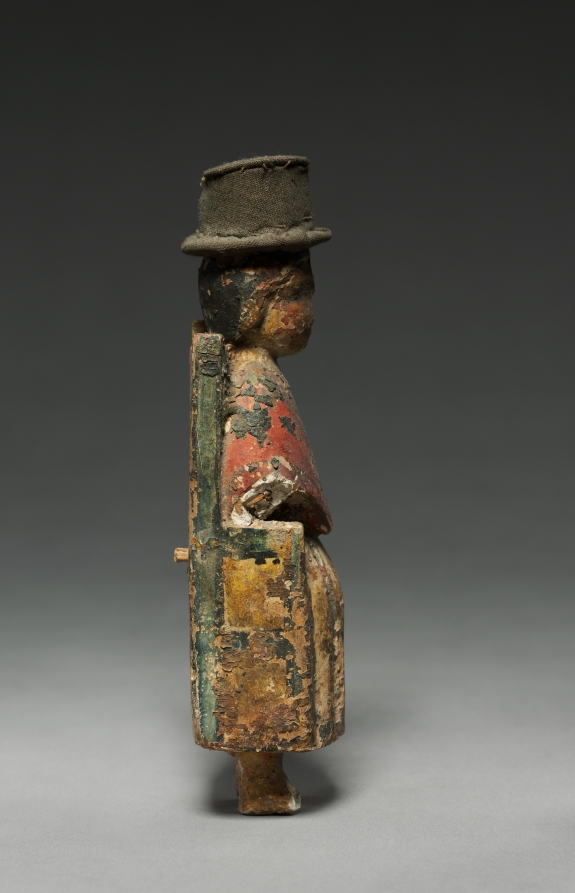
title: Christ Child: santo de bulto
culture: America, New Mexico, 17th-18th century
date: 1600s-1700s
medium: wood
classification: Sculpture